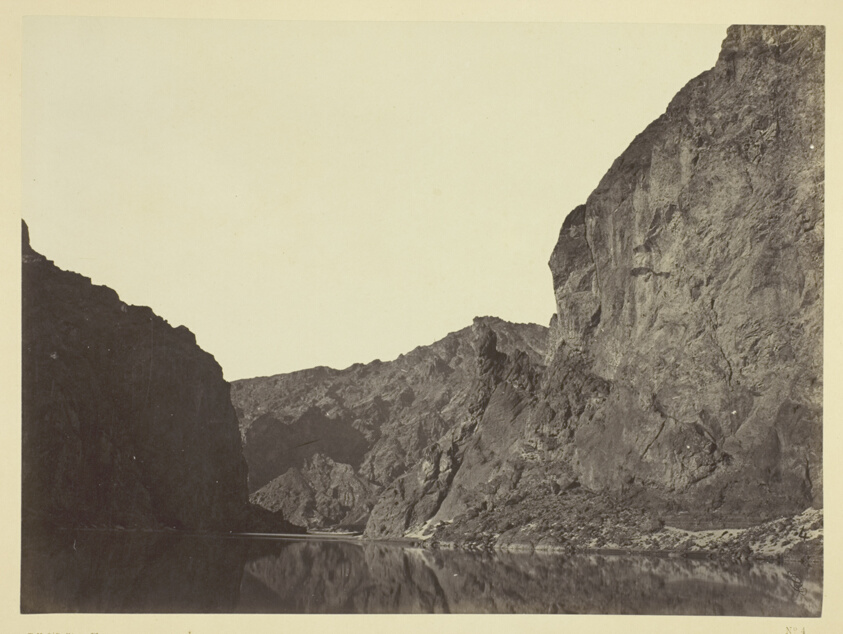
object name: Photograph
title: Black Cañon, Colorado River, looking below from Big Horn Camp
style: 19th century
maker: Timothy O'Sullivan (American, born Ireland, 1840–1882)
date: 1871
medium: Albumen print, from the album "Geographical & Geological Explorations & Surveys West of the 100th Meridian," vol. 1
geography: United States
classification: albumen silver print; photographic process; photography; photograph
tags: Collected by Hugh Edwards